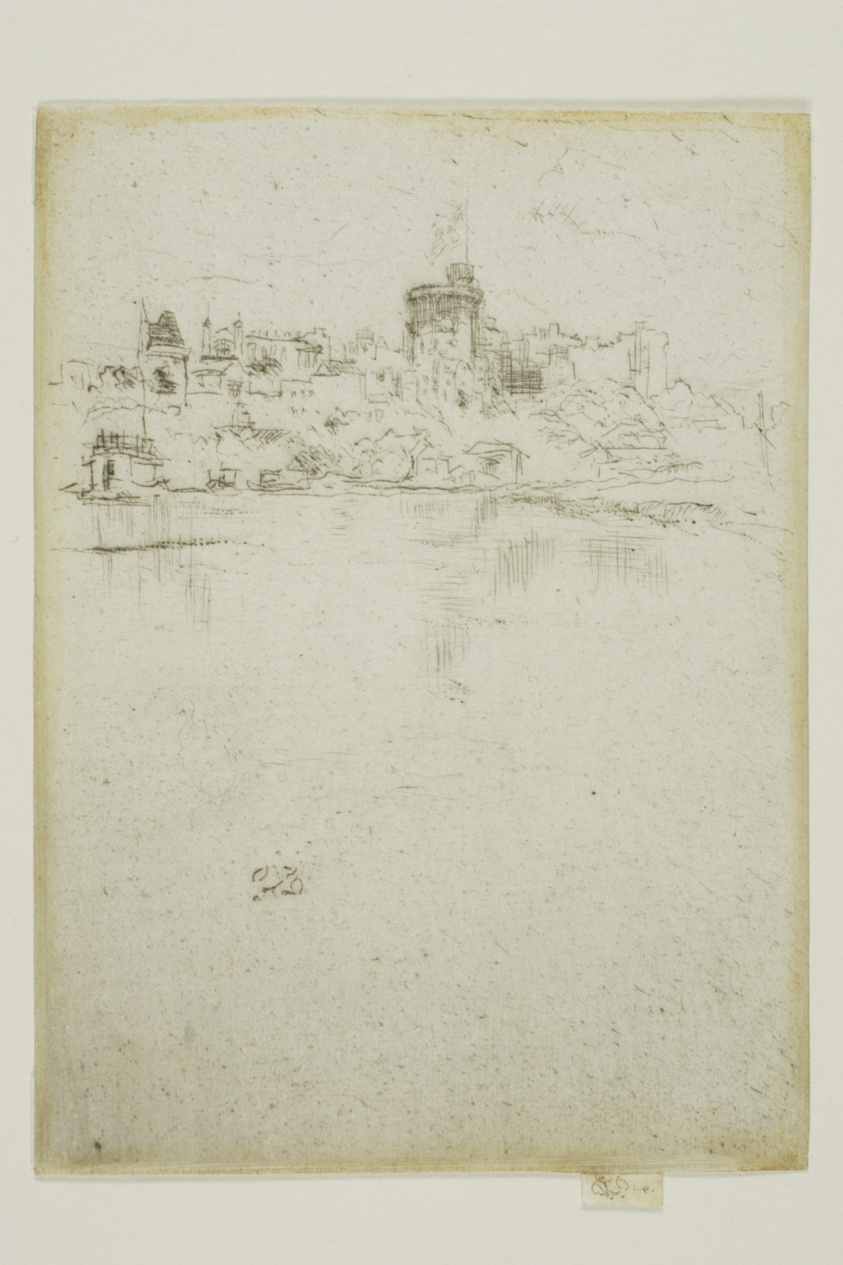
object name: Print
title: Windsor (Memorial)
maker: James McNeill Whistler (American, 1834-1903)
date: 1887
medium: Drypoint with foul biting in black ink on ivory laid paper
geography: United States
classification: drypoint; foul biting; print; prints and drawing; paper